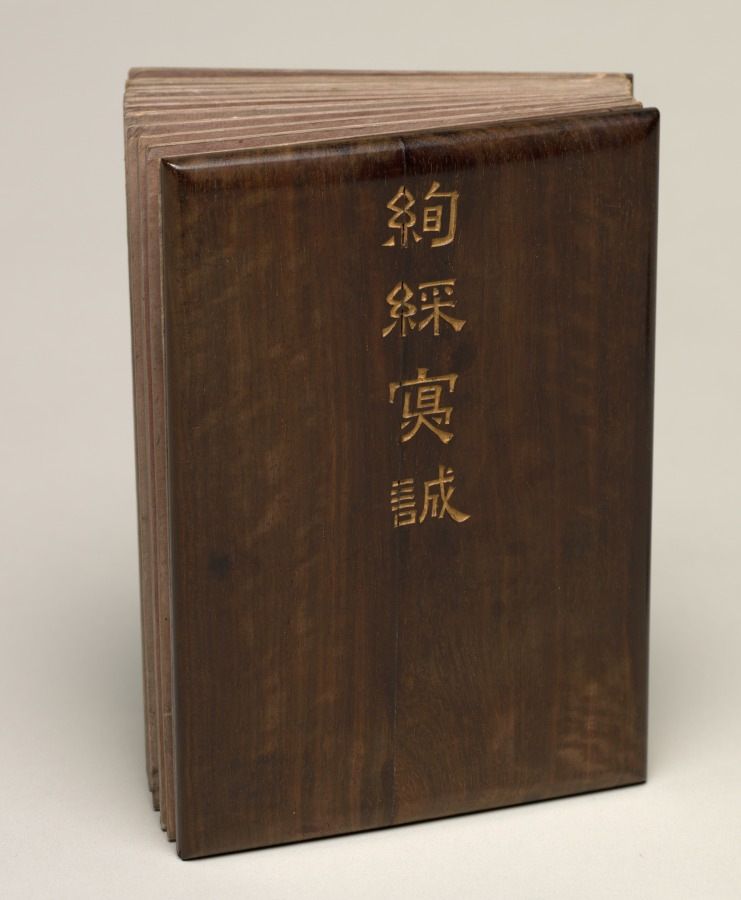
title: Desk Album: Flower and Bird Paintings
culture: China, Qing dynasty (1644-1911)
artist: Zhang Ruoai (Chinese, 1713–1746)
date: 1700s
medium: Album of ten leaves, ink and color on paper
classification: Painting